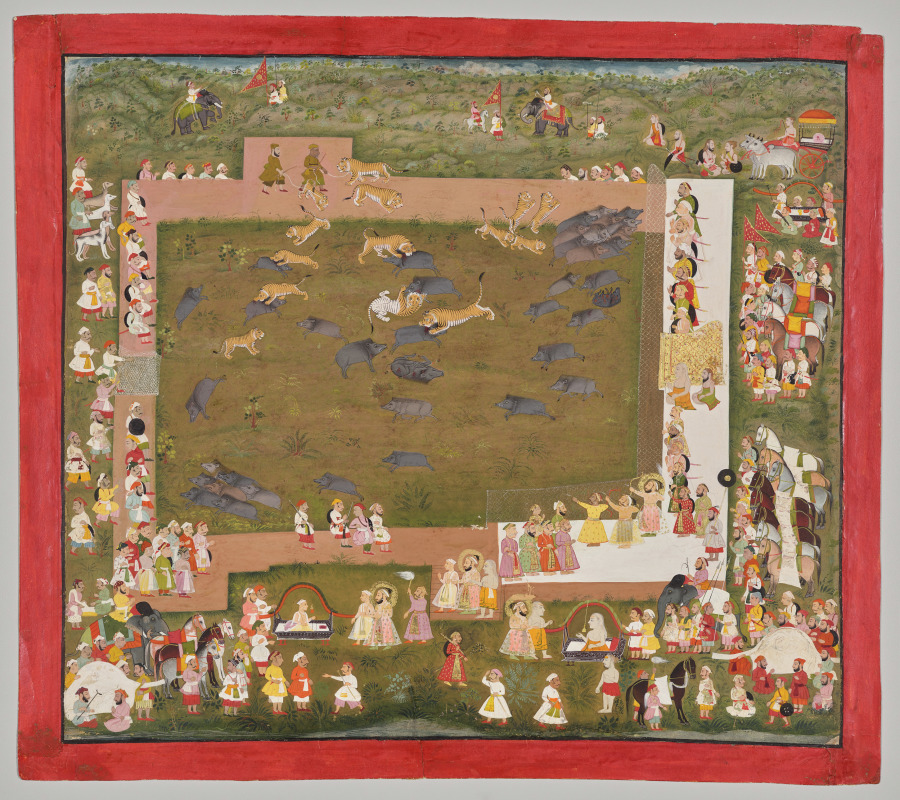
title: Maharana Sangram Singh II of Mewar (r. 1710–34) and Stages a Boar Hunt with Tigers at Sadri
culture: Northwestern India, Rajasthan, Rajput Kingdom of Mewar, Udaipur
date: c. 1720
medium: gum tempera, ink, and gold on paper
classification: Painting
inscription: [[verso, in red]] 2/48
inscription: [[verso, upper right corner]] sāḍāri od kālo cita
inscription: [[verso, in black, along bottom]] 102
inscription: [[verso, in black, to right of old inventory number]] Kimat RS 150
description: The king, who has the title of “maharana” in this region, is identifiable by his halo. At the bottom of the composition, he is pictured three times, welcoming two distinguished visitors who arrived in palanquins. He is shown again, standing behind a safety net at the corner of the white platform. He aims his arrow to shoot the boar and demonstrate his skill and virility. Two tigers are led into the arena at the top edge, and they are depicted multiple times chasing and capturing the prey.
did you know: The enclosure wall is shown from multiple perspectives, sometimes from above, sometimes in elevation.